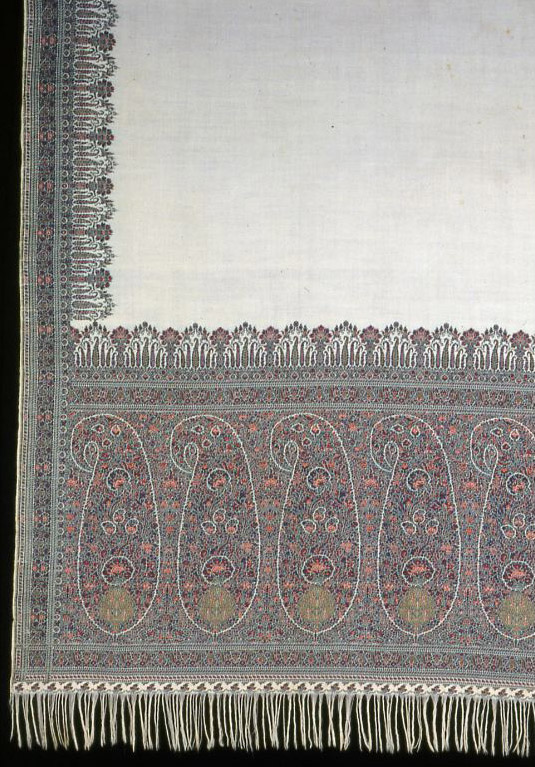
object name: Textile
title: Long Shawl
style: 19th century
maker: France or Scotland, Paisley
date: 1825/75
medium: Wool and silk, weft-float faced 1:3 'Z' twill weave with supplementary patterning wefts bound in weft-float faced 1:3 'Z' twill interlacings; main warp fringe; woven on loom with Jacquard attachment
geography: France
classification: costume accessory; weaving; textile; costume - weaving; costume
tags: paisley, fashion, floral motifs